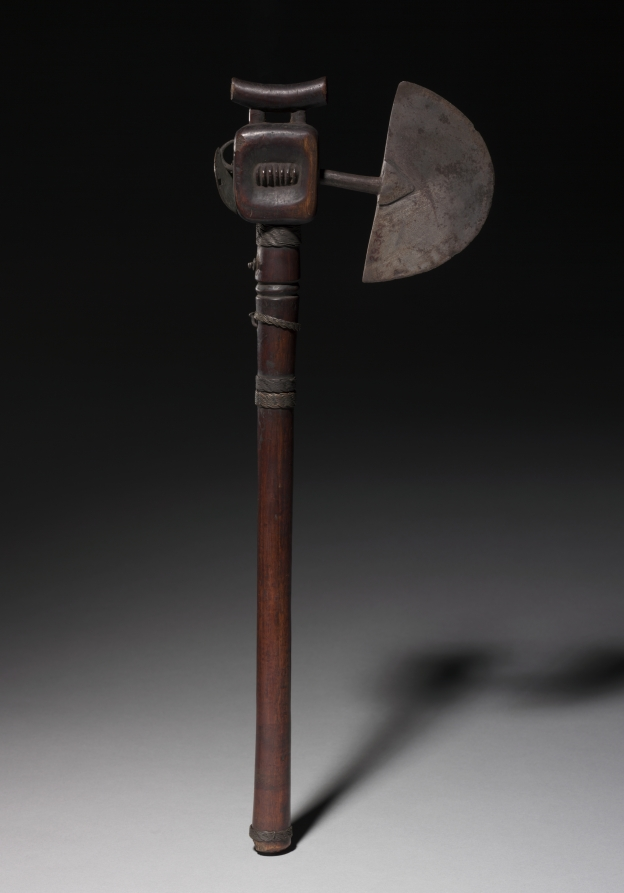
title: Ceremonial Axe (gano)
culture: Southern Africa, Zimbabwe, Shona-style blacksmith-carver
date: 1900s, by 1928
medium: Iron, wood, and metal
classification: Arms and Armor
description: This ceremonial axe (gano) showcases its maker’s skill in using different materials. The crescent-shaped blade was likely locally forged; braided wires and a Swiss pocket watch fragment on the handle were imported. Like the headrest nearby, gano were gendered female; a small headrest is carved at top. Too fine for battle, a man may have held it as a status or ancestral symbol during rituals or dancing. Though made for centuries, religious use of knives and axes waned due to early 20th-century Christianity and government laws. Rising independence-era Zimbabwean nationalism (1960s–70s) revived tradition-based religion and associated objects like the gano.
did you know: This ceremonial axe has a half-moon piece of metal nailed to it, marked "EKB Depose." It is part of the mechanism for a pocket watch made by Edward Kummer of Bettlach, whose Swiss factories marked watches with his initials between 1888 and 1932.